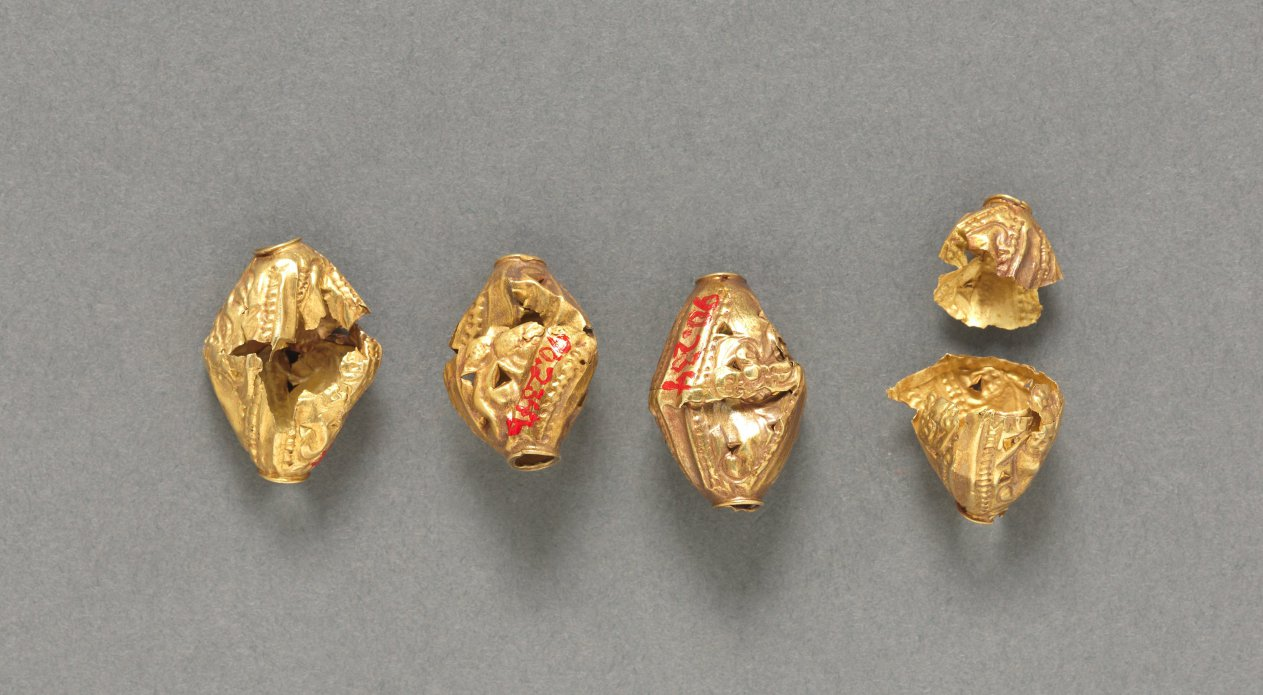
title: Beads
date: after 1519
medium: gold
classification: Jewelry